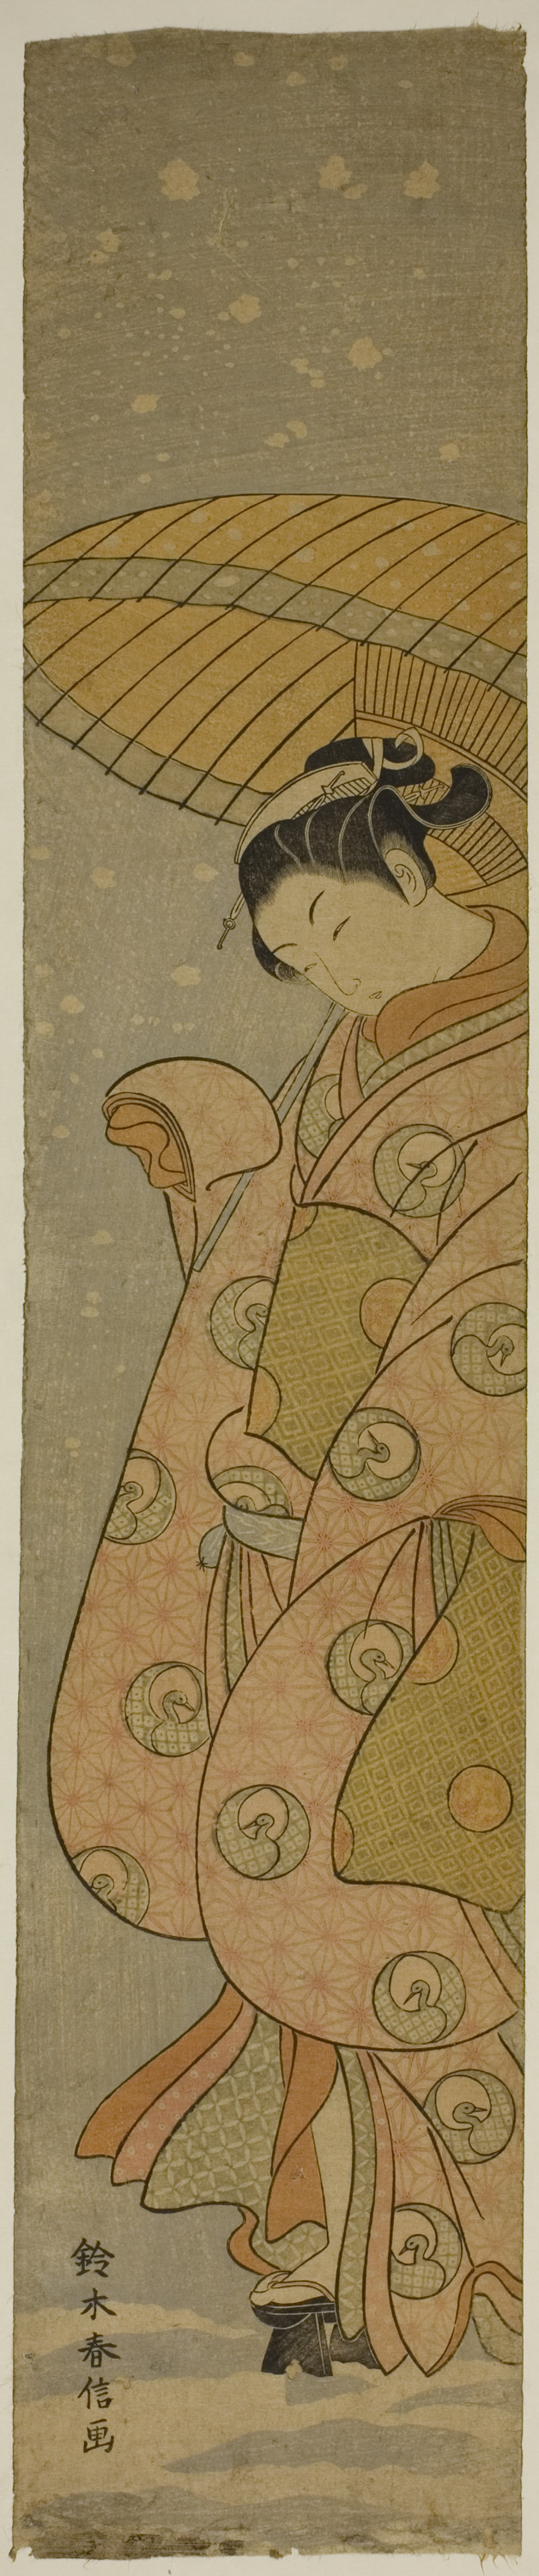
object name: Print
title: Beauty Under an Umbrella in the Snow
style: Japanese (culture or style)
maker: Suzuki Harunobu 鈴木 春信; Japanese, 1725 (?)-1770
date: c. 1770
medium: Color woodblock print; hashira-e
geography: Japan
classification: woodblock print; print; asian art